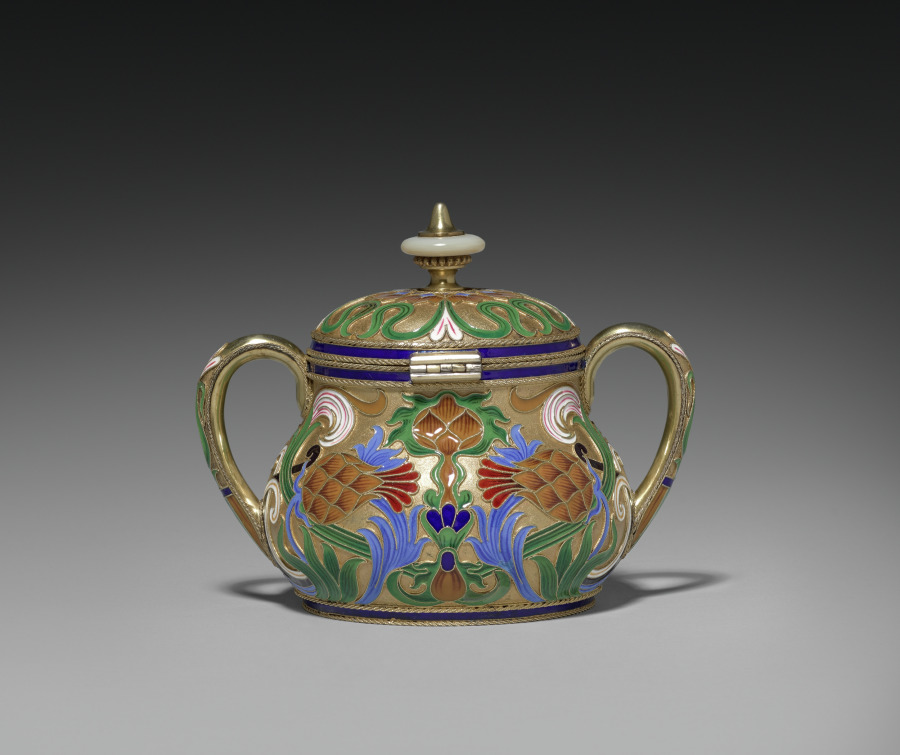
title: Covered Sugar Bowl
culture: Russia, St. Petersburg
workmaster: attributed to Feodor Ivanovich Rückert (Russian, 1840–1917)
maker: House of Fabergé (Russian, 1842–1918)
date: 1887–96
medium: silver gilt, opaque cloisonné enamel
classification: Miscellaneous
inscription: 84, St. George [assay mark for Moscow, 1882-1896]; C. Fabergé (in Cyrillic); double-headed eagle [imperial warrant]; St. George?; initials of Carl Fabergé (in Cyrillic); 10593 scratched.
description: Fabergé’s craftsmen in Moscow, especially under the watchful eye of workmaster Feodor Rückert, became known for their work in the pan-Slavic or neo-Russian style, hearkening back to 17th-century motifs of Russian folk art. Often on rather conventional shapes, Rückert and his silversmiths created an explosion of color, achieved through the historic technique of cloisonné enamel in which tiny metal lines are soldered to the surface then filled with glass powders in various colors and fired to create a high gloss finish. The result is a spectacular evocation of the 17th-century originals. Far from mere copies, however, Rückert's designs, such as this tea service, employ naturalistic or abstract motifs in a thoroughly modern adaptation of a remarkable earlier period of Russian art and decoration.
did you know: This covered sugar bowl is part of a larger tea service.